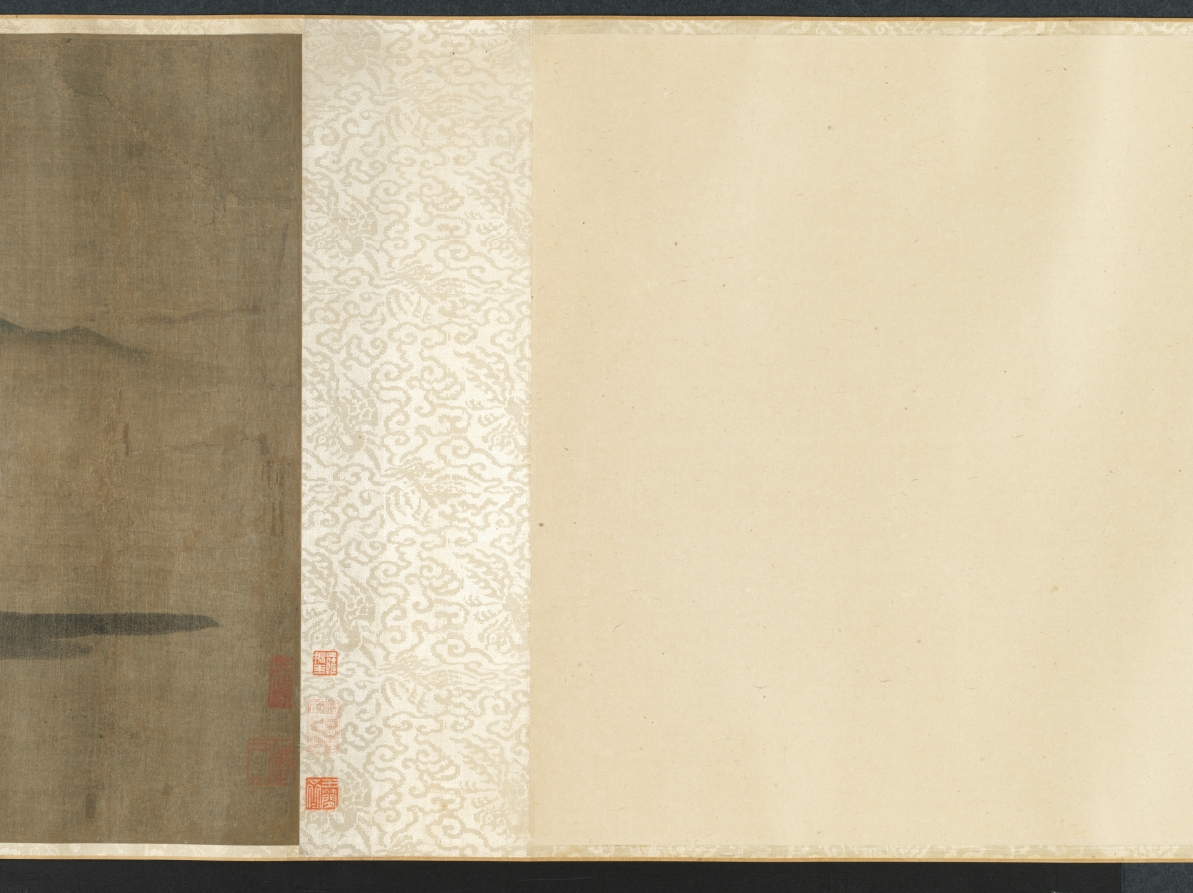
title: Cloudy Mountains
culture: China, Southern Song dynasty (1127-1279)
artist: Mi Youren (Chinese, 1072–1151)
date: 1130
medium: Handscroll; ink and color on silk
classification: Painting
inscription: 好山無數接天涯，烟靄陰晴日夕佳。/ 要識先生會到此，故留筆戲在君家。/ 庚戍歲，辟地新昌作。元暉。/ [seal] 元暉戲作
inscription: [Seal] 安陽孫氏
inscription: [Seal] 畢瀧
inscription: [Seal] 成親王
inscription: [Seal] 永瑆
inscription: [Seal] 錫三 appears twice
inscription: [Seal] 養性齋珍藏書畫印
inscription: [Seal] 芷陔審定真跡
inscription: [Seal] 玉簡齋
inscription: 2 colophons (1 dated 1650), inscription dated 1647, and 2 seals of Wang To (1592–1652)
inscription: 1 colophon, dated second month of the gengyin year 庚寅 (1650), and 2 seals of Chen Kuang 陳爌 (1646 jinshi degree)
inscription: 7 seals unidentified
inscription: A separate scroll containing six colophons on Cloudy Mountains exists; the inscribers are Luo Zhenyu 羅振玉 (1866–1940), Naito Torajiro 內藤虎次郎 (1866–1934), Nagao Ko 長尾甲 (1864–1942), and Wu Changshuo 吳昌碩 (1844–1927). Naito Torajiro alone wrote three colophons.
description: Cloudy Mountains captures the view of a lush and misty riverscape, an impression of Mi Youren’s new environment, painted in a moment of peace. With the fall of the Northern Song dynasty in 1127 upon the Jurchen’s military invasion, Mi Youren fled south across the Yangzi River. In 1130, he had reached Xinchang in Zhejiang province and thanked his host with this painting for having given him shelter. Mi Youren was the oldest son of the art critic Mi Fu (1051– 1107); both developed a distinct style of mountain scenery by accumulating wet ink dots that create a hazy atmosphere.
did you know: This scroll is one of the museum’s earliest dated Chinese paintings.